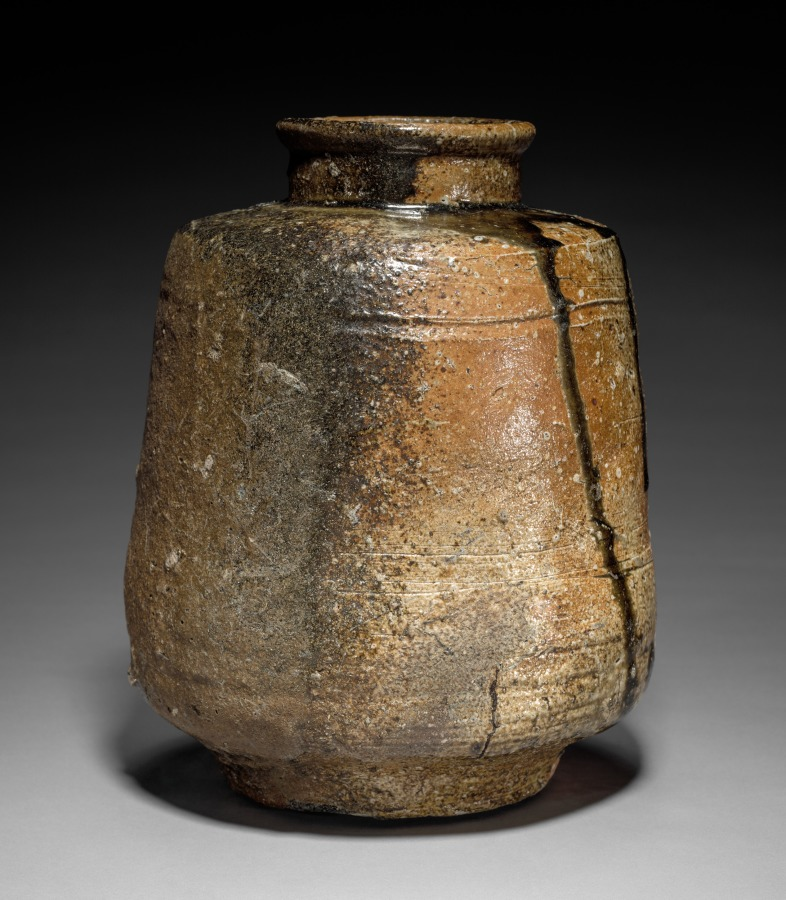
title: Tea Storage Jar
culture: Japan, Momoyama period (1573–1615)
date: 1573–1615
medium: glazed stoneware (Shigaraki ware)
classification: Ceramic